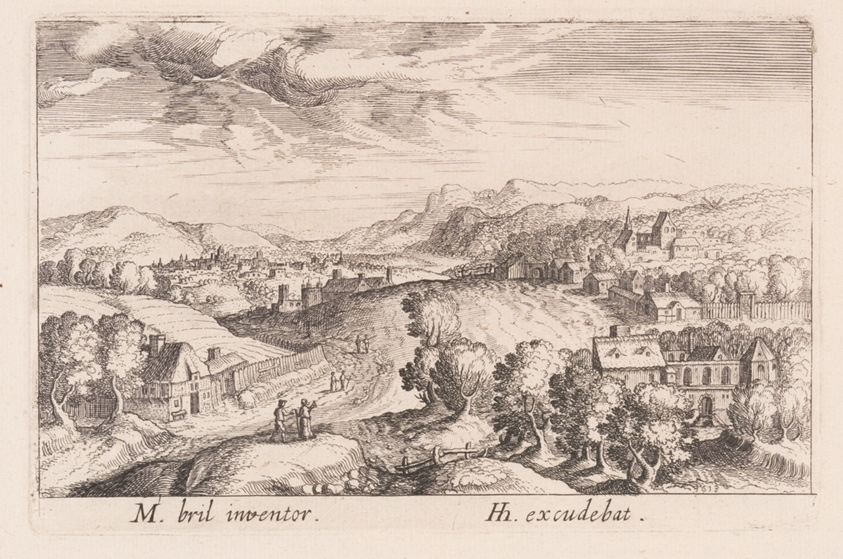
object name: Print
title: Hilly Landscape with Three Couples, from Topographia Variarum Regionum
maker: Simon Frisius (Dutch, c. 1580–1629); after Matthijs Bril (Flemish, 1550-1583)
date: 1614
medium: Etching on paper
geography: Netherlands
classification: etching; paper; print; prints and drawing